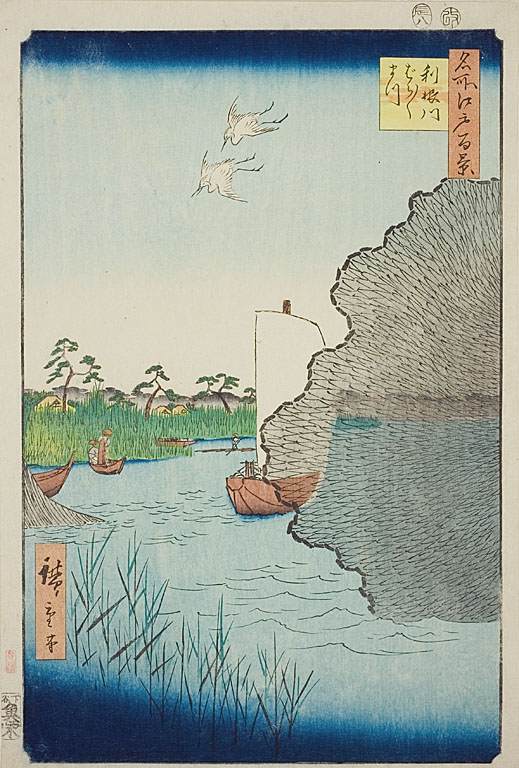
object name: Print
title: Scattered Pines on the Tone River (Tonegawa Barabara-matsu), No.71 from the series “One Hundred Famous Views of Edo (Meisho Edo hyakkei)”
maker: Utagawa Hiroshige (Japanese, 1797-1858)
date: 1856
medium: Color woodblock print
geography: Japan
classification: woodblock print; print; asian art